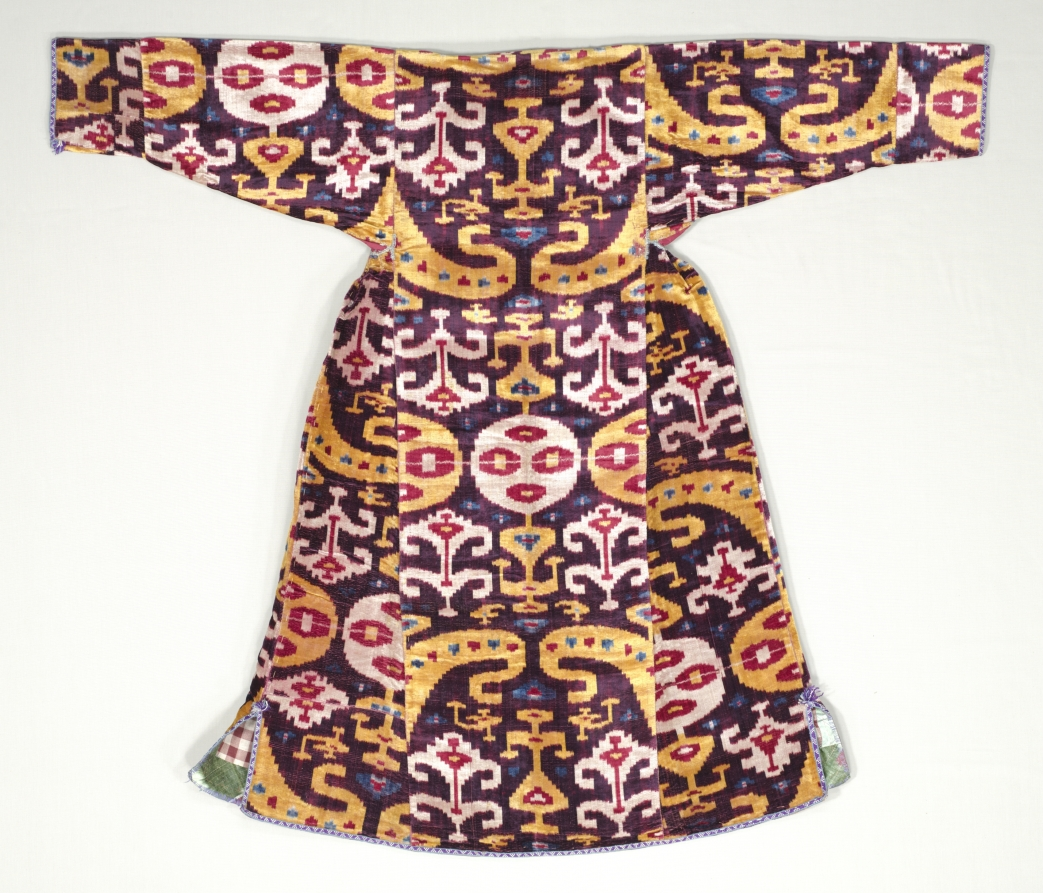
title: Woman’s Robe (munisak)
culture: Uzbekistan, Bukhara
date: 1850–75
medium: Silk: velvet ikat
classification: Garment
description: Dazzling ikat velvet robes, the most sumptuous, expensive, and prestigious type of ikat, were worn throughout Central Asia by men and women. This resplendent robe with a V-shaped neckline, fitted torso, and slightly flaring skirt features stylized blossoming plants, pomegranates, and auspicious curved ram’s horns, all with irregular contours of the resist-dye ikat technique. Such female robes were culturally significant in Central Asia. Made for wedding dowries with fabric from the groom’s family, women wore munisaks for rites of passage throughout their lives, as a bride, at family festivals, and funerals.